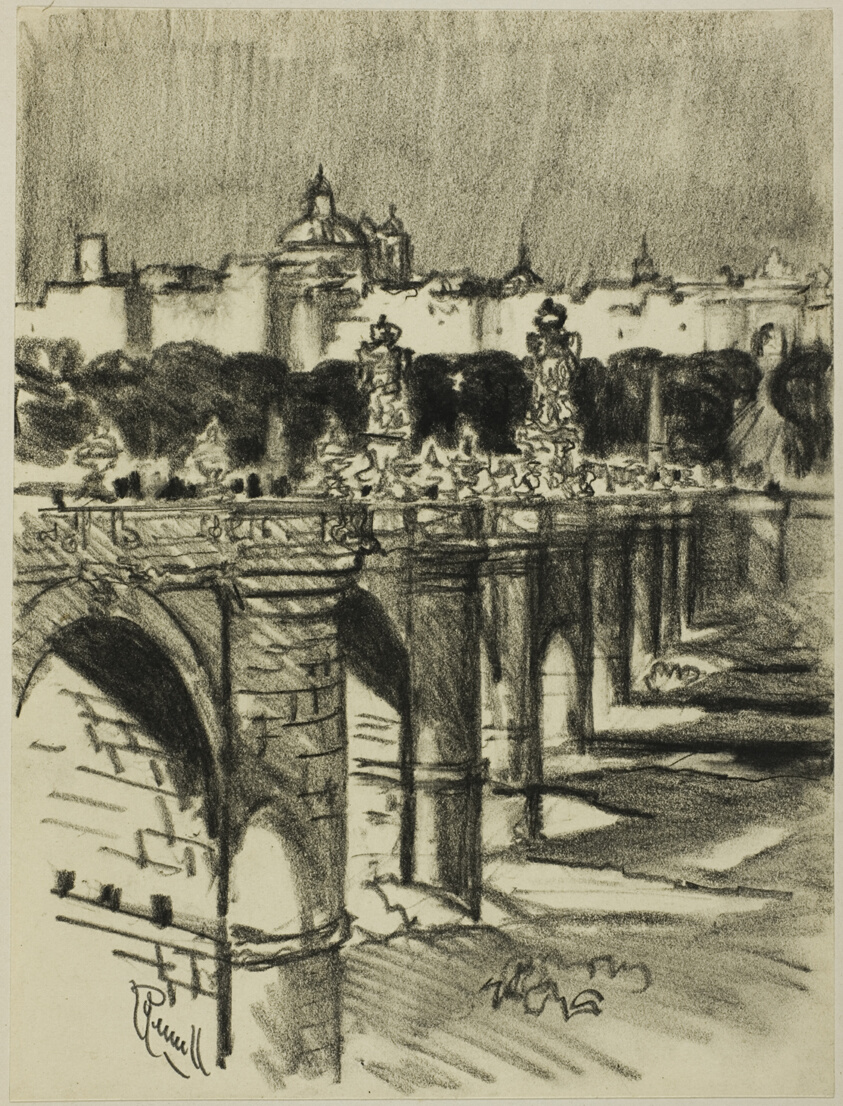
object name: Drawing and Watercolor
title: The Bridge of Toledo, Madrid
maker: Joseph Pennell (American, 1857-1926)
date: c. 1903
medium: Oiled charcoal with stumping and erasing, on cream wove paper, perimeter mounted on off-white wood pulp laminate board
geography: United States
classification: charcoal; drawings (visual works); prints and drawing